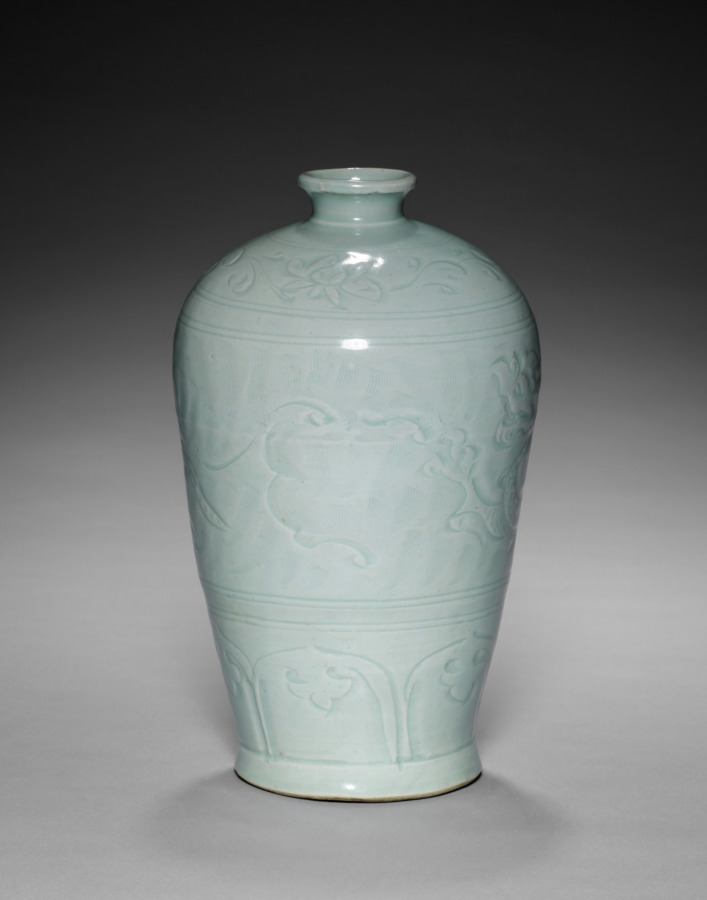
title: Meiping Vase with carved Dragon Motif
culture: South China, Yuan dynasty (1279–1368)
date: 1300s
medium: Porcelain with pale bluish-white (qingbai; 青白) glaze and carved decoration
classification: Ceramic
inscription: There are multiple self-adhesive labels on the bottom: 1. Square white (now yellowed with age) label with "90" written in red ink. 2. White rectangular label with "L.80.17.8" written in pencil. 3. Fabric tape cut to rectangular shape with "L.2161.49 /39" written in black ink. 4. White round label from Lally & Co. New York with "X2295" written in black ink.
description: A fierce coiling dragon chasing a pearl amid mist and clouds—a symbol of fertility and power—decorates this sturdy vase. Its shoulder is incised with a band of lotus flowers and the base features a border of lotus petals. Meiping, literally prunus vase, derives its name from being used to display a single floral spray, traditionally a branch of blossoming plum (or prunus), apricot, or cherry.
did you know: In Chinese mythology, the dragon is believed to transport human souls to the heavens after death.